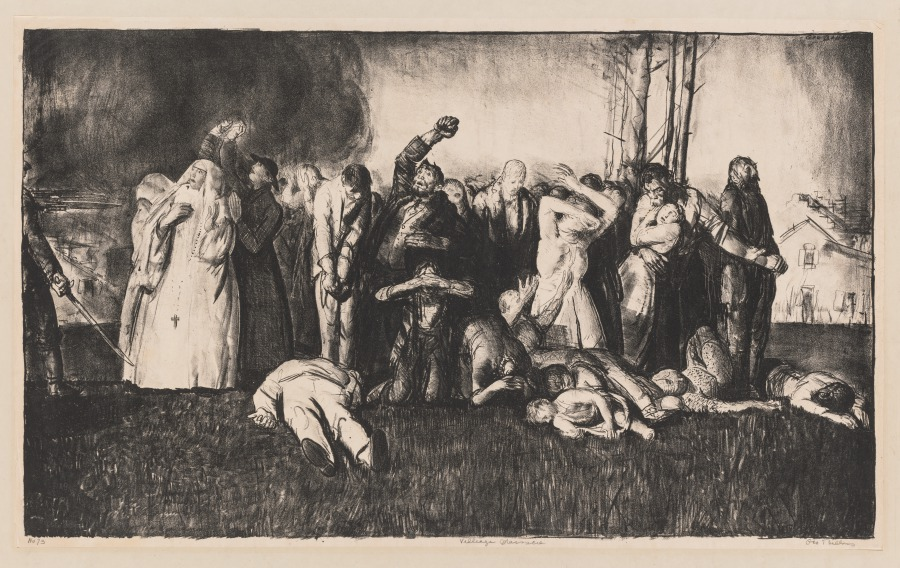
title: Massacre at Dinant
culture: America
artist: George Bellows (American, 1882–1925)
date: 1918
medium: lithograph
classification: Print